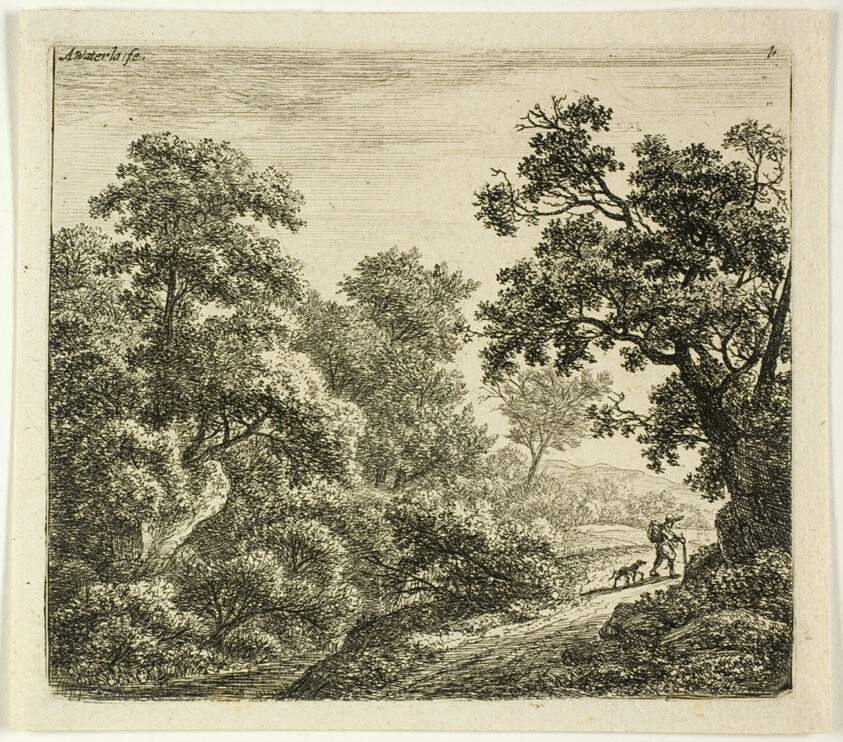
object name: Print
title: The Wanderer and His Dog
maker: Anthonie Waterloo (Dutch, c. 1610-1690)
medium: Etching on paper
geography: Holland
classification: etching; print; prints and drawing